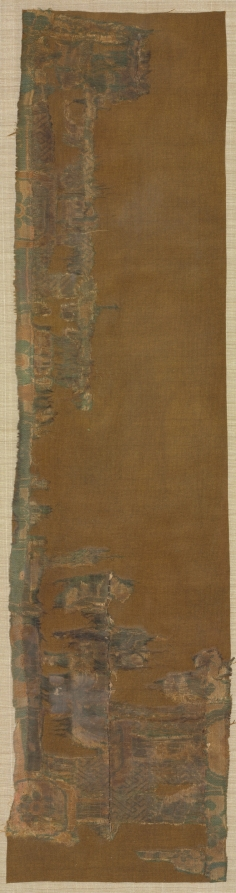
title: Vajrapani Embroidered Mount with Garuda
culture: China and Tibet, Embroidery: China, Yuan dynasty (1279-1368); painting: Tibet, 17th century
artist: Choying Dorje, the Tenth Black Hat Karmapa (Tibetan, 1604–1674)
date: painting 1600s, embroidery c. 1300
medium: Opaque watercolor, gold, and silver on silk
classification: Embroidery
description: The painting depicts the Buddhist protector who holds (pani) the thunder bolt (vajra) in his right hand. He kneels in reverence and holds his left hand in a gesture of salute. This unusual image appears to have been the vision of a Tibetan monastic patriarch known for creating his own inventive paintings and sculptures. Sewn to the painting are Chinese damask borders and rare embroideries dating to the Chinese Yuan dynasty (1279–1368). They depict man-eagle figures known as Garuda, a form occasionally assumed by Vajrapani.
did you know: Vajrapani sometimes takes the form of Garuda, enemy of snakes.